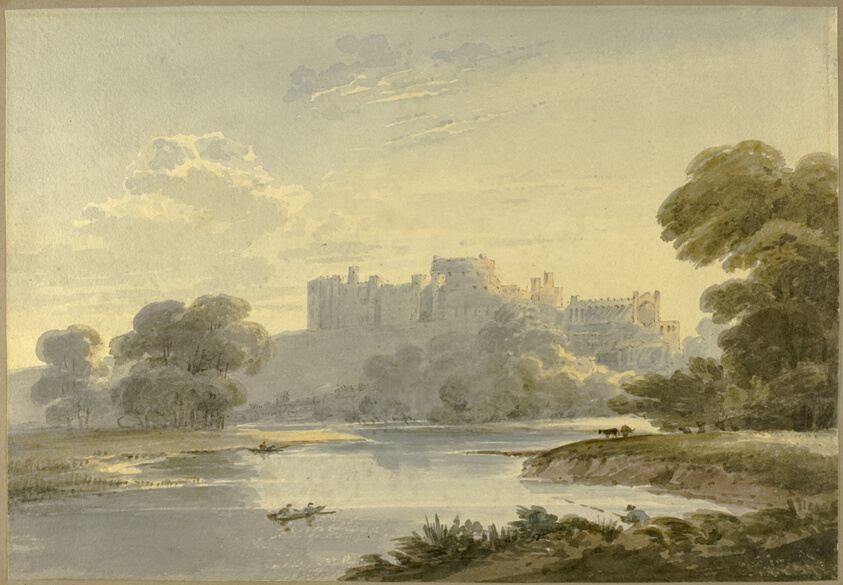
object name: Drawing and Watercolor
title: View of Windsor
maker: Unknown artist; English, 19th century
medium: Watercolor, over traces of graphite, on cream wove paper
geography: England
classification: watercolor; drawings (visual works); prints and drawing